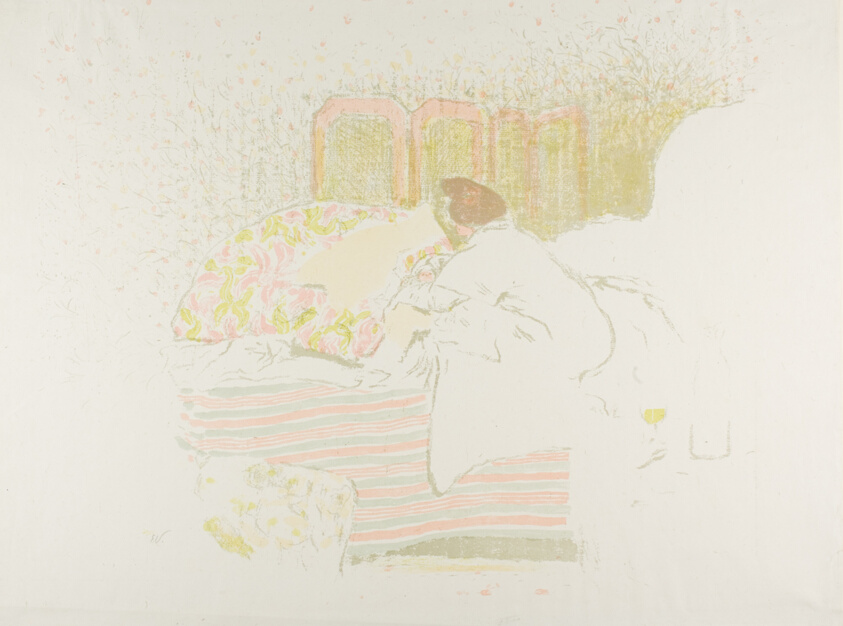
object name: Print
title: The Birth of Annette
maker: Edouard Jean Vuillard; French, 1868-1940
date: c. 1899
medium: Color lithograph on grayish-ivory laid China paper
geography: France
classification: lithograph; print; prints and drawing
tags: mothers, children